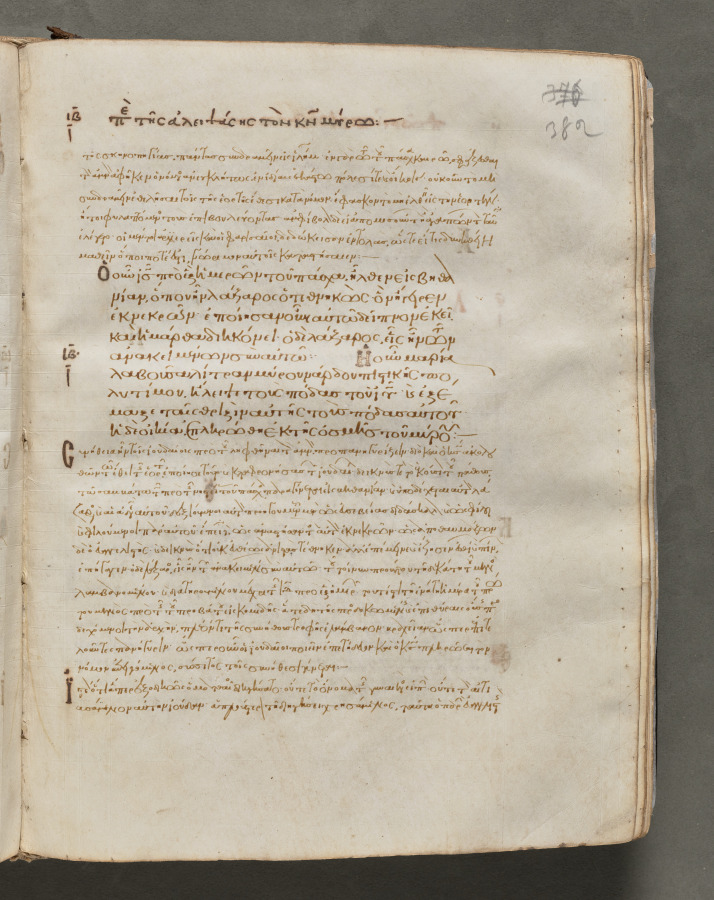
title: Text, folio 382 (recto), from a Gospel Book with Commentaries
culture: Byzantium, Constantinople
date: c. 1000–1100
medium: ink, tempera, and gold on vellum; leather binding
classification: Bound Volume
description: Each of the four gospels in this book opens on a page with brilliantly illuminated borders depicting the author of the text as well as birds—principally peacocks, symbols of the immortality of the soul—and fountains, representing the fountain of life and the salvation of the soul. This volume consists of 428 leaves with texts in Greek. Its level of sophistication suggests that it was probably written and decorated in a monastery in Constantinople.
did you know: Gospel books were carried in procession through Byzantine churches.